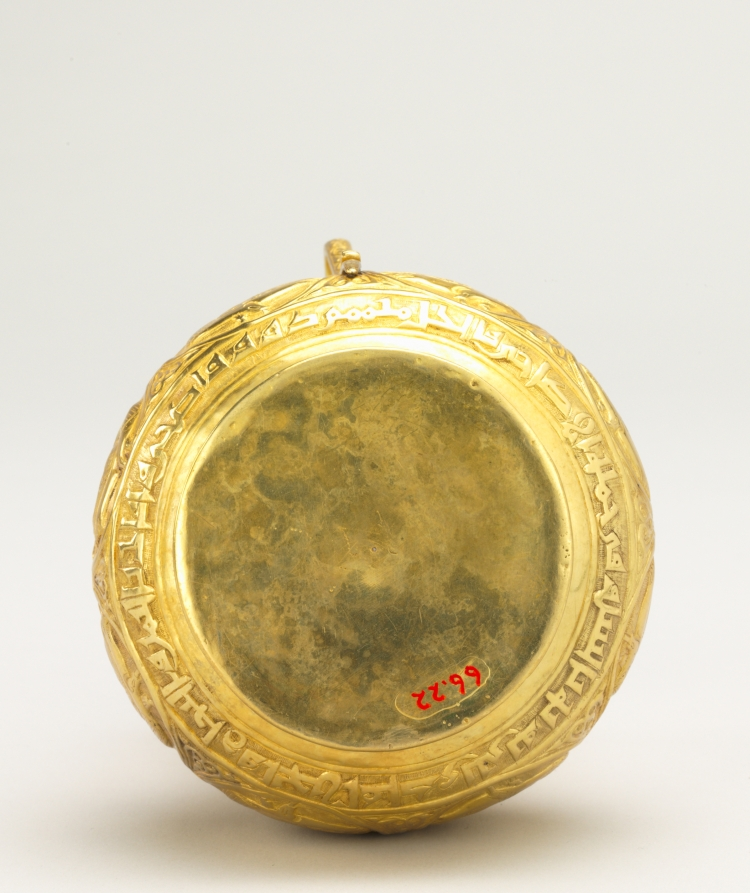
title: Jug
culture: Iran or Iraq, Baghdad, Buyid Period, reign of Samsam al-Dawla (985-998 AD)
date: late 900s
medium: gold with repoussé and chased and engraved decoration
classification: Metalwork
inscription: The inscription bands contain Arabic poetry which translates, in part: "You are the image of the full moon at night, the first gleam of sun on the horizon of the morning. You are a sword in the times of war, a beneficent rain in times of peace...your sword cuts the necks of Buyid enemies in great quantities...Glory and prosperity to the just king Samsam al-Dawla...May God lengthen your reign!"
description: This jug is one of the rare surviving Islamic vessels made entirely of precious metal. Its inscription bands contain Arabic poetry that translates, in part: "You are the image of the full moon at night, the first gleam of sun on the horizon of the morning. You are a sword in the times of war, a beneficent rain in times of peace . . . your sword cuts the necks of Buyid enemies in great quantities . . . Glory and prosperity to the just king Samsam al-Dawla . . . May God lengthen your reign!"